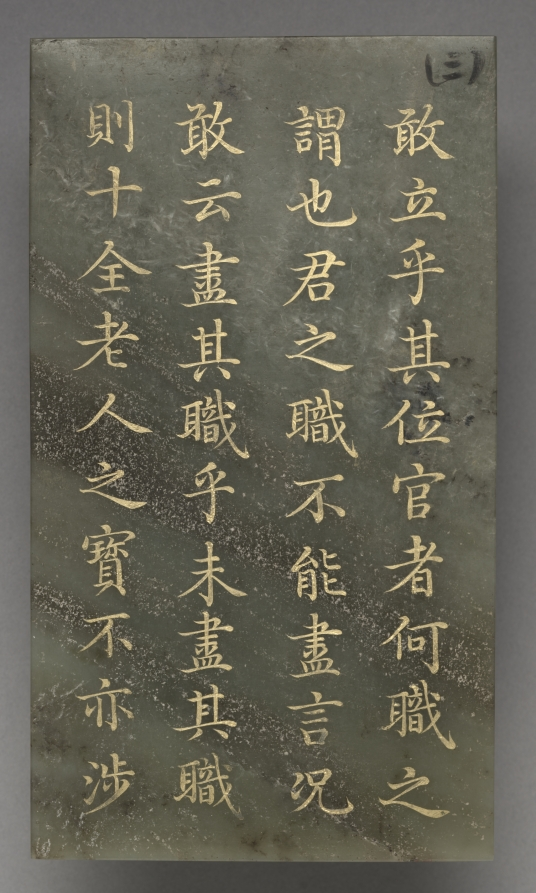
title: Tablet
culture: China, Qing dynasty (1644–1911), Qianlong reign (1736–95)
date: 1778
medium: jade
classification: Jade